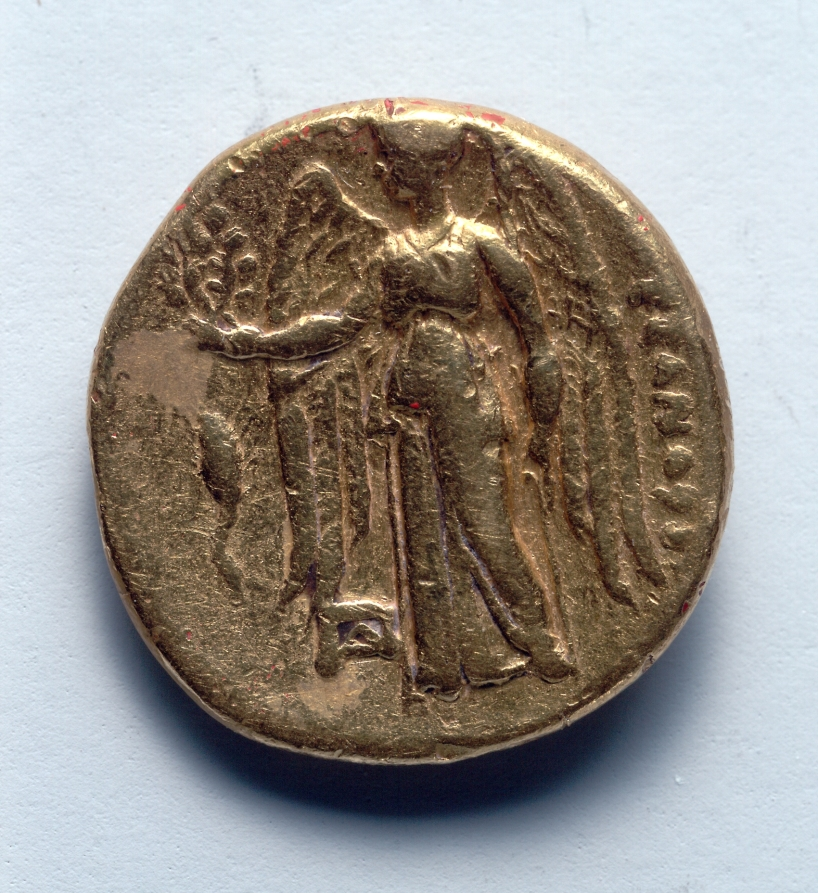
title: Stater: Winged Nike, l., Holding Wreath (reverse)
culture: Greek, Macedonian, minted at Abydos (Egypt), reign of Alexander III [The Great}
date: 336–323 BCE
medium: gold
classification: Coins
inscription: [ΑΛ]ΕΞΑΝΔΡΟ[Υ]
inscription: Δ within Π